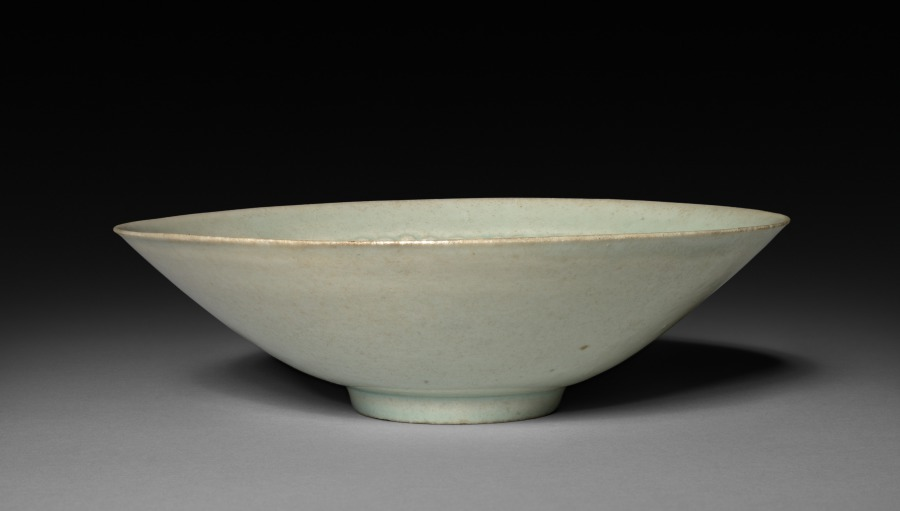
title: Bowl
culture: China, Southern Song dynasty (1127-1279)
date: 1100s–1200s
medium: Glazed porcelain, qingbai ("blue-white") ware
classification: Ceramic